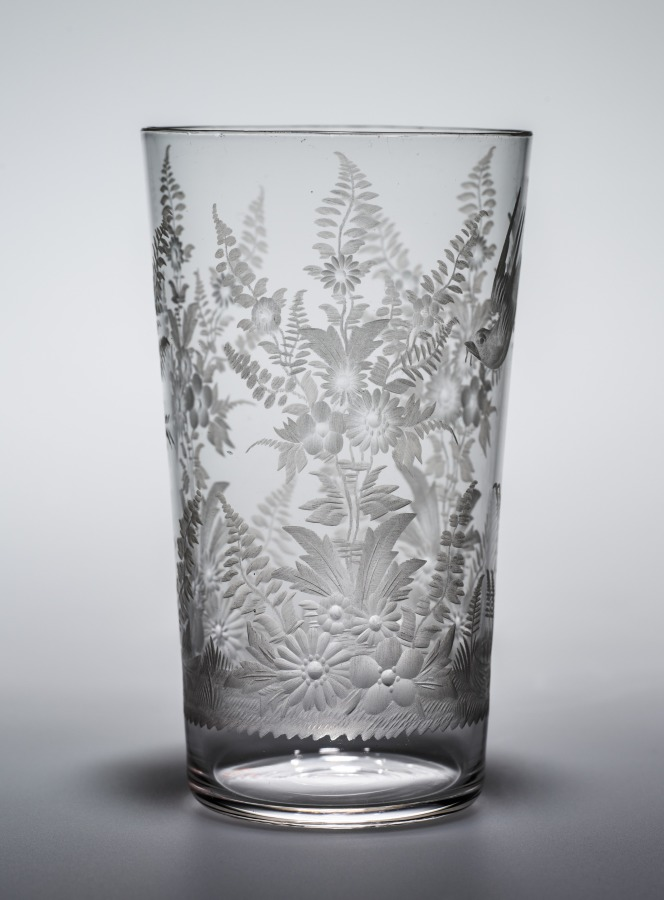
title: Tumbler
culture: America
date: 1850–1899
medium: glass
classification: Glass